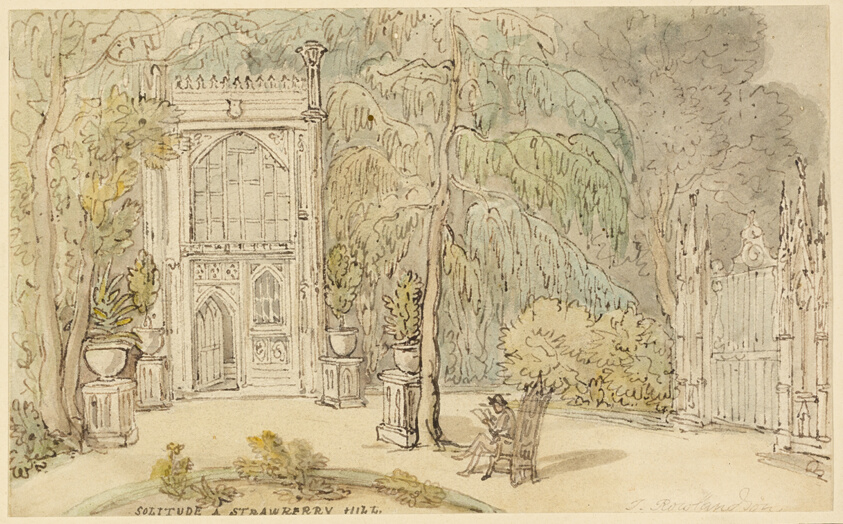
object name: Drawing and Watercolor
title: Solitude at Strawberry Hill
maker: Thomas Rowlandson (English, 1756-1827)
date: c. 1822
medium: Pen and brown ink, with brush and watercolor, on cream wove paper, laid down on board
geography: England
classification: watercolor; drawings (visual works); prints and drawing